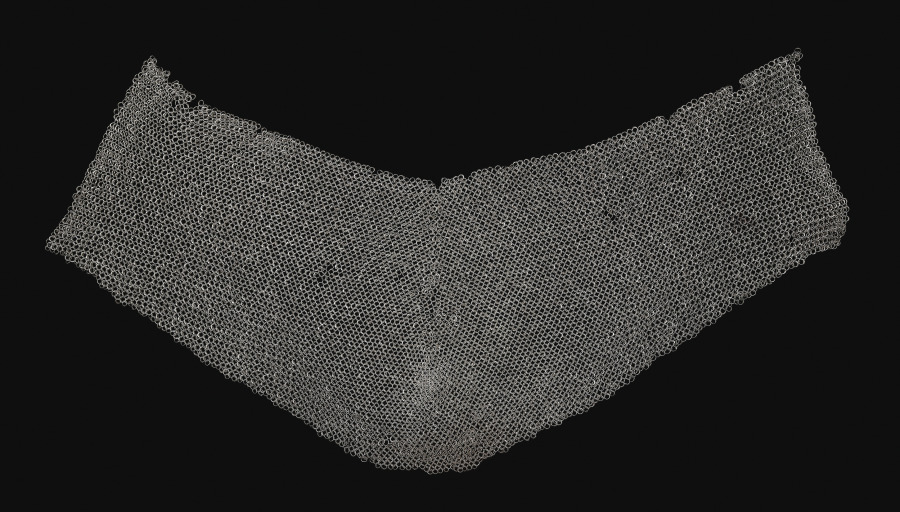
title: Cape of Mail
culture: Europe, 16th century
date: 1500s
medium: steel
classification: Arms and Armor